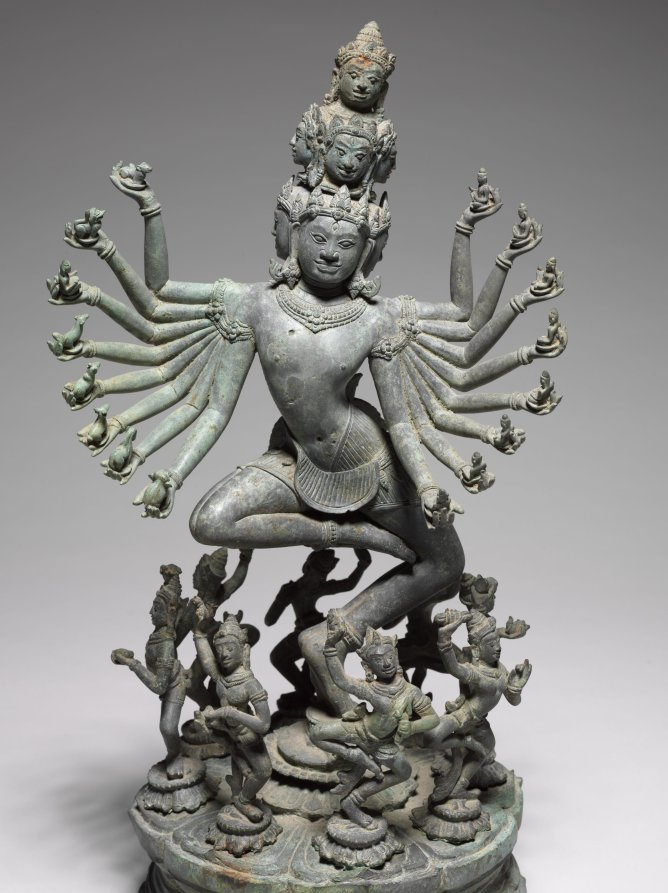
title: Hevajra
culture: Northeastern Thailand, former kingdom of Angkor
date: c. 1200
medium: Bronze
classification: Sculpture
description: Hevajra was an important figure signaling the practice of Buddhist rituals. King Jayavarman VII placed particular emphasis on Hevajra during consecration rituals and set up a colossal stone sculpture of dancing Hevajra at the east gate of his fortified city in the Khmer capital at Angkor. In the Cambodia of Jayavarman VII, tantric Buddhism became public and widespread, practiced together with other more mainstream forms of Buddhism, Hinduism, and ancestor worship. The iconography of Hevajra is described in detail in a text that bears his name, the Hevajra-tantra, first composed in India probably in the 800s. Hevajra has eight heads, sixteen arms, and four legs. His left hands hold images of Indic gods; wealth, death, sun, moon, fire, wind, water, and earth. In his right hands are animals: bull, lion, human, cat, camel, sheep, horse, and elephant. They all sit in skull cups, objects also used in tantric rituals. He dances on a corpse that embodies ignorance and is surrounded by eight yoginis who dance triumphantly in a ring around him. Yoginis functioned as intercessors between human practitioners and enlightened beings. Many bronze images of Hevajra were made during the reign of Jayavarman VII, but few survive in as pristine condition as this example. According to scientific analysis and curatorial reports, this sculpture survived in a clay vessel submerged in water, which accounts for its high tin content and unusual gray patina. Samples from the clay core reveal the presence of the mineral feldspar, a characteristic of clay from the Isaan plateau, on the other side of the mountain range not far from Banteay Chhmar, in present-day Thailand.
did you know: Hevajra, the Tantric Buddhist deity who personifies Enlightenment, dances vigorously to symbolize the human soul's liberation from the snare of existence.